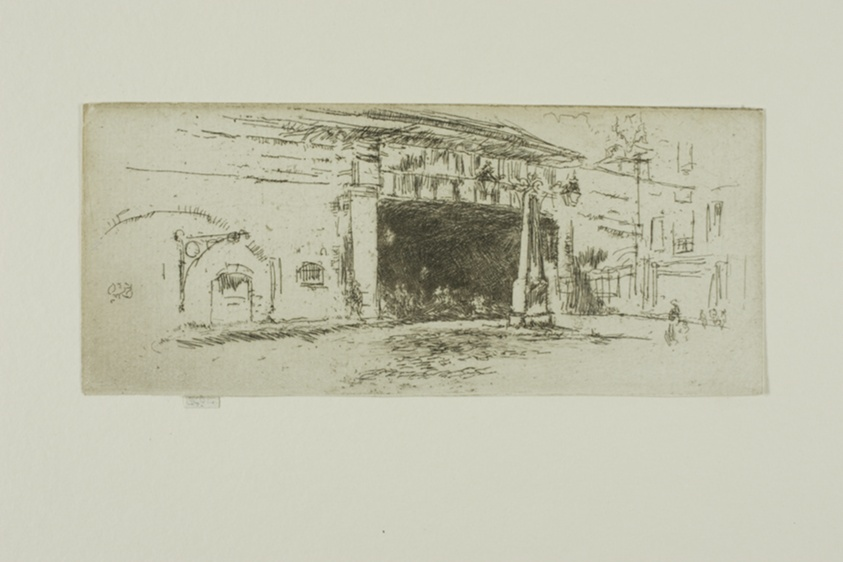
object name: Print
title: Railway Arch, American Square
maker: James McNeill Whistler (American, 1834-1903)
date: 1887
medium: Etching with foul biting in black ink on off-white laid paper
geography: United States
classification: etching; foul biting; print; prints and drawing; paper